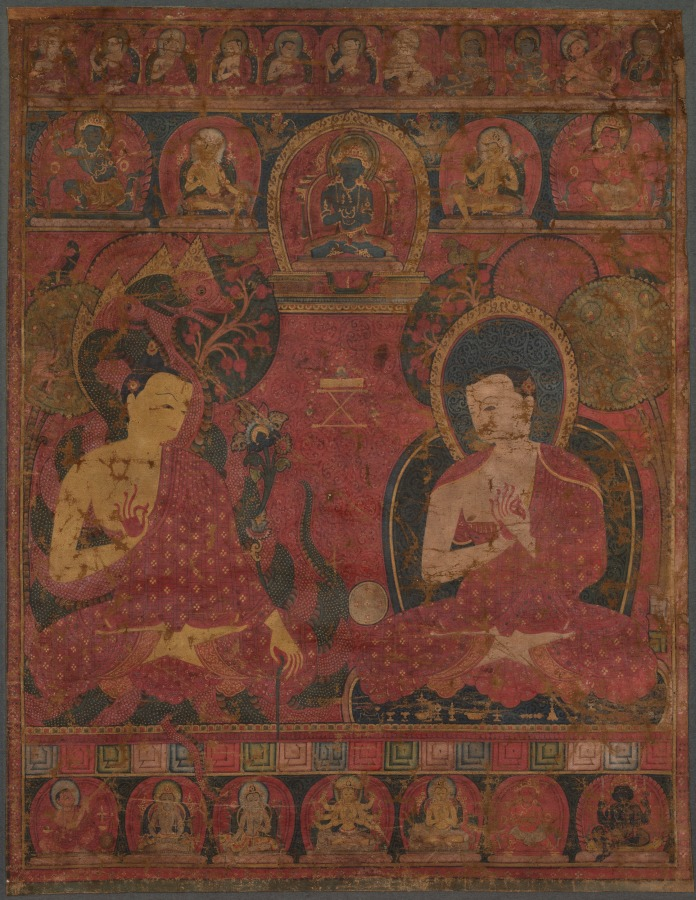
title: Nagarjuna (c. 150–250 CE) with a Buddhist Master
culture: Nepal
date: c. 1300s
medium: gum tempera on sized cotton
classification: Painting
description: Nagarjuna, the Buddhist philosopher from southern India, sits on his eponymous red and black serpents, or naga. His interlocutor may be his disciple Aryadeva. A volume of the Perfection of Wisdom, honored with flowers, is on a golden bookstand between their heads. The figures sit beneath flowering and fruiting trees with peacocks and parrots, evoking the landscape of India. Lineage masters of the Sakya order of Buddhism are aligned in the top row, beginning with Virupa at the upper right. The monk who was the donor of this painting is in the lower left corner.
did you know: The Bodhisattva of Wisdom, who was Nagarjuna's teacher, is in the central 8-armed figure in the bottom row.